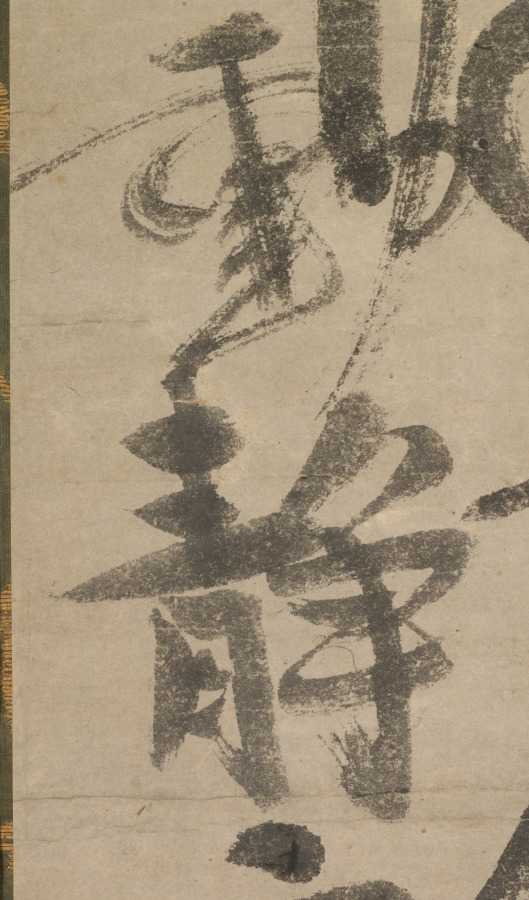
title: Reflections of Priest Foyen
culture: Japan, Muromachi period (1392–1573)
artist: Ikkyū Sōjun (Japanese, 1394–1481)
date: 1400s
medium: hanging scroll, ink on paper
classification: Painting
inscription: signed: "Kido nanasei son, Ikkyūshi Sōjun sho (Written by Ikkyū Sōjun, the seventh generation of Kido)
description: Left by his mother at a small Zen temple in Kyoto at the age of six, Ikkyu later drew on his early studies and experiences for his writings, which focused on his keen interest in the Chinese classics. Poetry in particular was a favorite subject and images from classical poetry or passages from favorite poems or commentaries frequently provided Ikkyu with the core ideas for his own work. A rare example of his calligraphy, this narrow scroll contains a verse in eight phrases, each comprising four characters. The whole verse is organized in three towering lines of brusque, emphatic calligraphy augmented by Ikkyu's signature-the two lines of running script in the lower left corner. The text refers to a passage included in the Chronicle of the Zen Sect that contains a cautionary reminder attributed to the legendary Chinese monk Foyen Qingyuan (1067-1120), long revered in Japan. The initial phrase begins: "Life is a mirage."